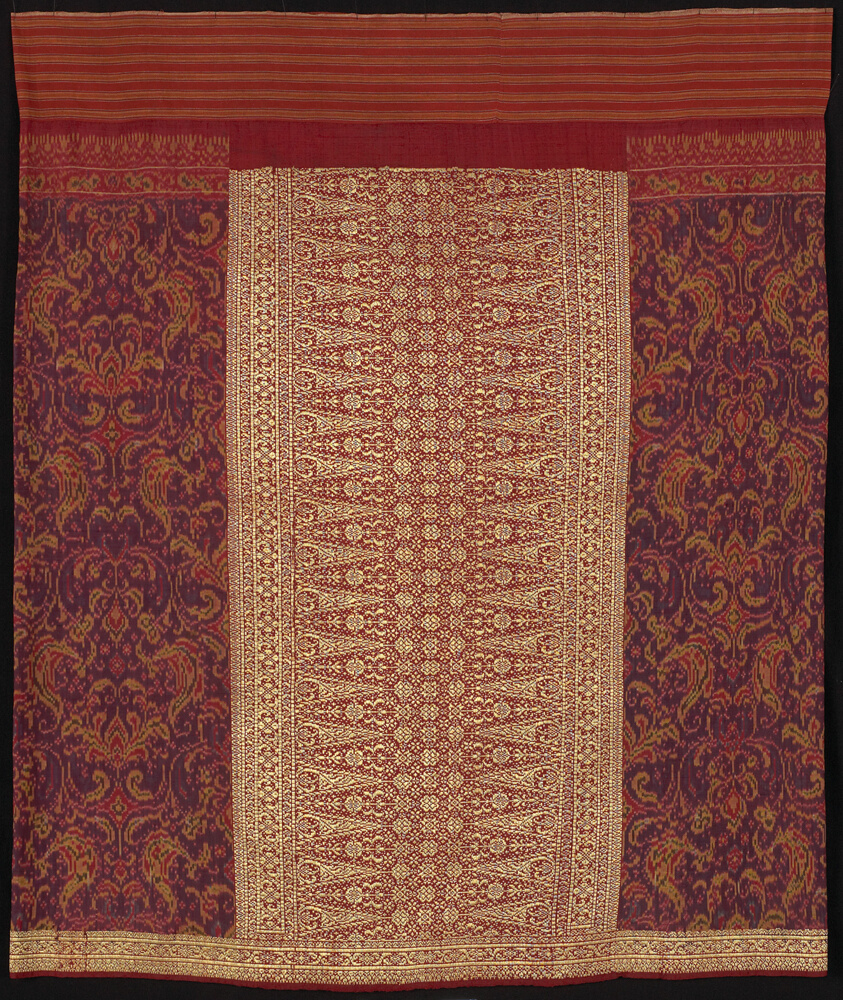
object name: Costume and Accessories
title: Sarong (sarong limar)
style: indonesian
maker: Indonesia, Bangka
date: 19th century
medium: Silk and gold-leaf-over-lacquered-paper-strip-wrapped silk, weft resist dyed (weft ikat), plain weave with supplementary brocading wefts; attached waistband of cotton, warp-stripe plain weave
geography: Indonesia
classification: textile; weaving - printed; costume